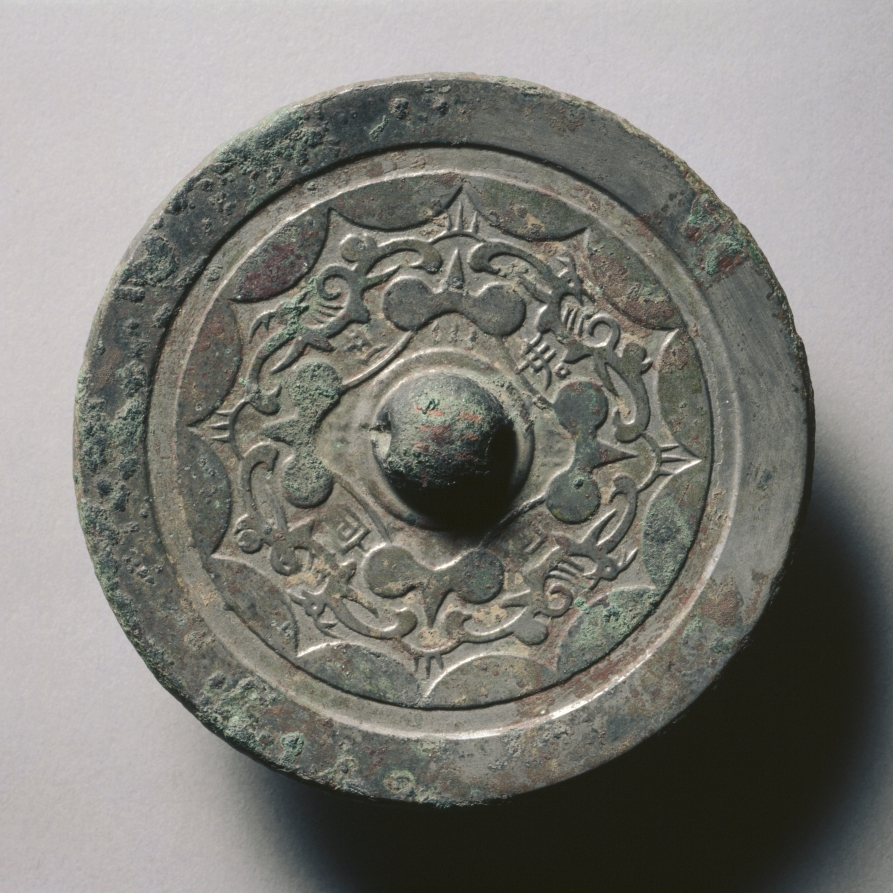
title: Mirror with Quatrefoil and Linked Arcs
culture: China, Eastern Han dynasty (25–220 CE)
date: 25–220 CE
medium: bronze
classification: Metalwork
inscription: 君宜官位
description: Inscription: You deserve an official post.